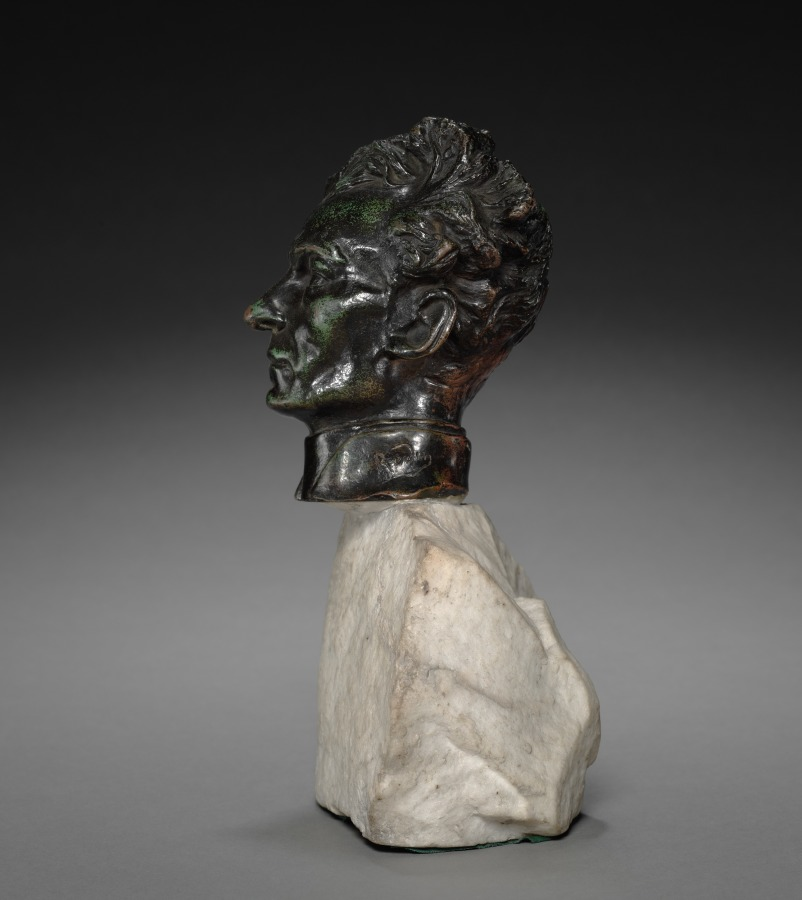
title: Father Pierre-Julien Eymard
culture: France, 19th century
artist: Auguste Rodin (French, 1840–1917)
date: ca. 1863 (original model)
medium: bronze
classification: Sculpture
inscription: Signed on left side of collar: "Rodin"; on base, back right: "A. Rodin"